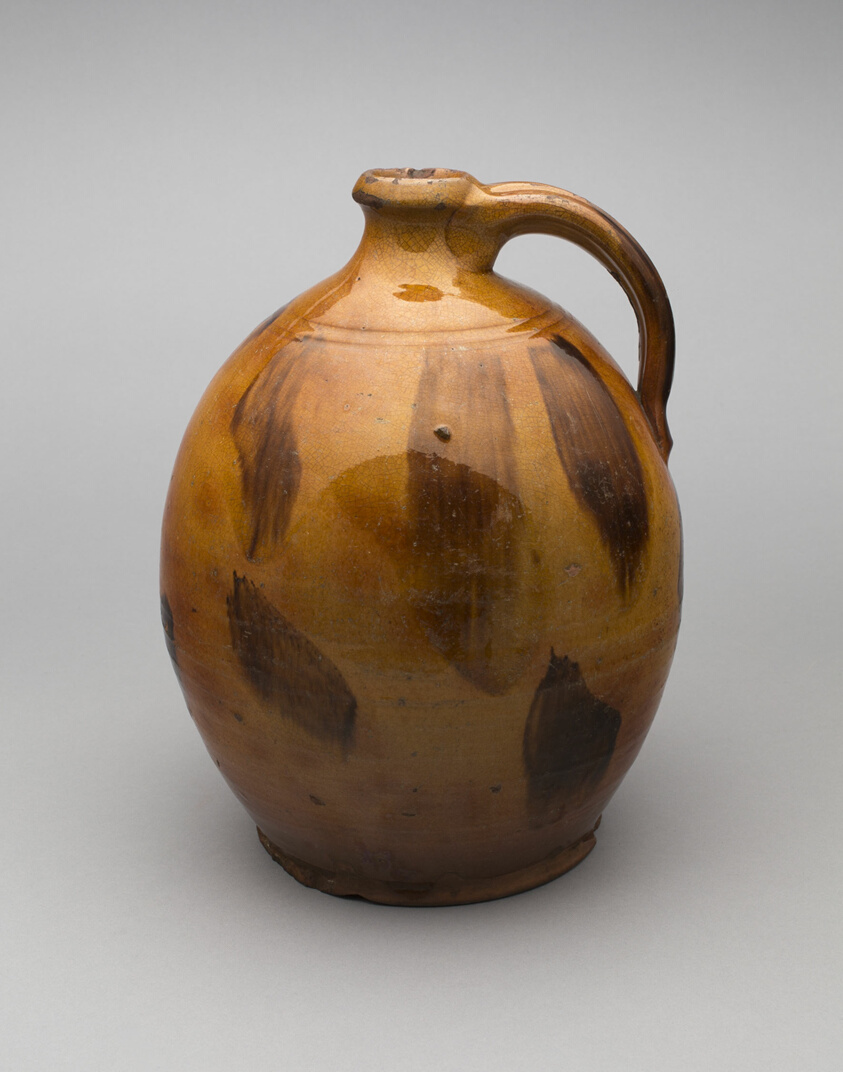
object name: Decorative Arts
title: Jug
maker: Artist unknown (American, 18th–19th century); Probably New England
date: 1790–1830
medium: Earthenware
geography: New England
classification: vessel; american decorative arts; american arts; ceramics; decorative arts